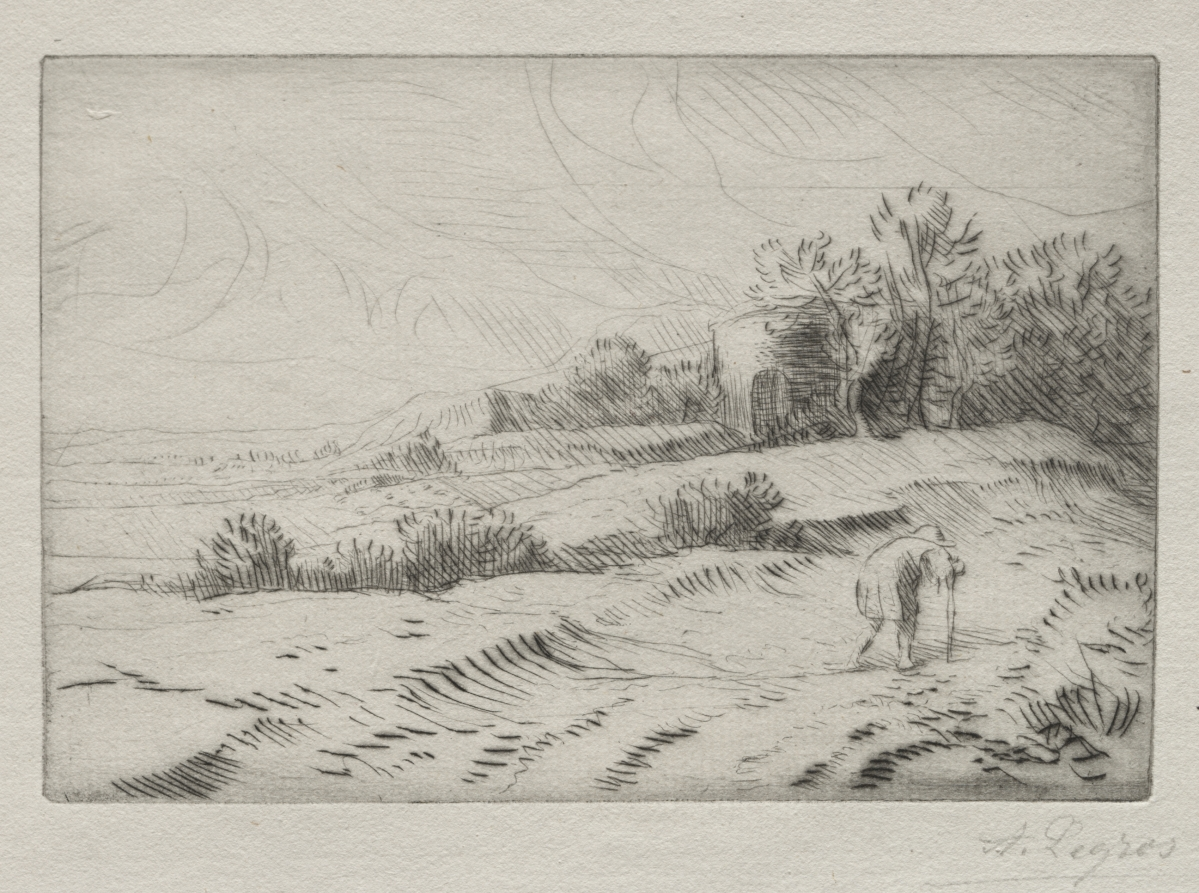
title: The Tower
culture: France, 19th-20th century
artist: Alphonse Legros (French, 1837–1911)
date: c. 1857–1911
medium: etching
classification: Print